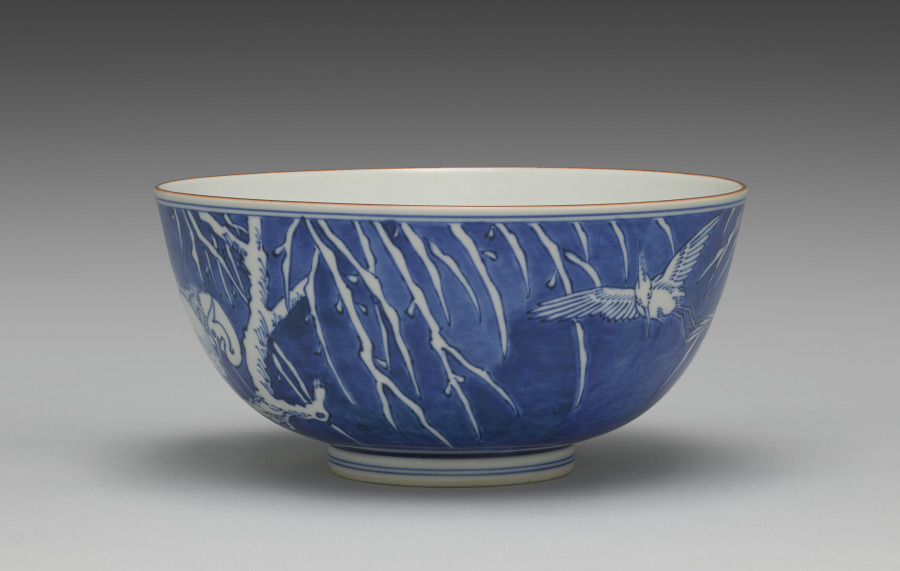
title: Sweets Bowl with Egrets and Willow in Snow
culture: Japan, Meiji period (1868–1912)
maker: Seifū Yohei III (Japanese, 1851–1914)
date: 1912–14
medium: Porcelain with underglaze blue and iron oxide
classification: Ceramic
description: For this sweets bowl, Yohei III designed a dramatic surround of egrets in a willow tree under heavy snow. The entire design is painted in cobalt blue under the transparent glaze. If one turns the bowl clockwise, two egrets come into view, one after the other. As they ascend, both struggle against the wind amid snow-laden weeping willow branches. They are followed by a stretch of willow branches that evoke the bitter cold. The sky is painted with blue washes all around the designs. The imagery culminates in a group of three egrets huddled together in the crotch of the tree. Of course, it is also possible to read the scene in the other direction, in which case the sheltering egrets look toward one of the flying egrets, who looks back at them, and it is the egret with wings outspread, looking directly down, who concludes the scene. Two thin bands of blue set off the design just under the bowl’s rim, and a band of brown iron oxide runs along the rim. Another two bands of blue run around the middle of the foot. The inside of the bowl’s box lid has an attestation by Yohei IV that it is the work of Yohei III.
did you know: This sweets bowl requires someone to rotate it to experience the birds observing one another.